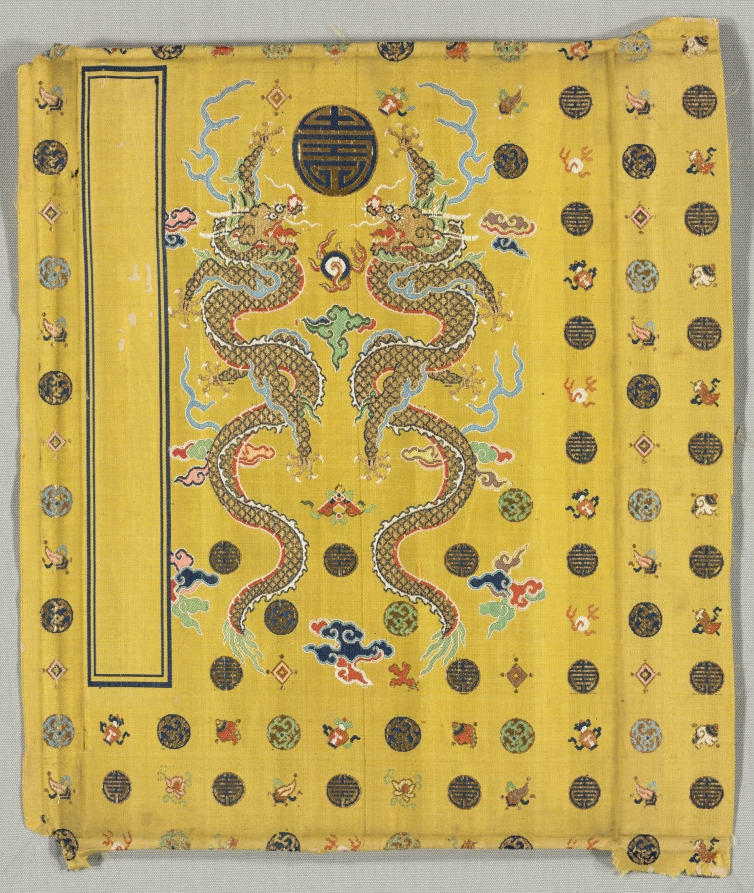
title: Book Cover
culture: China, 18th century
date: 1700s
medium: lampas weave, silk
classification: Textile